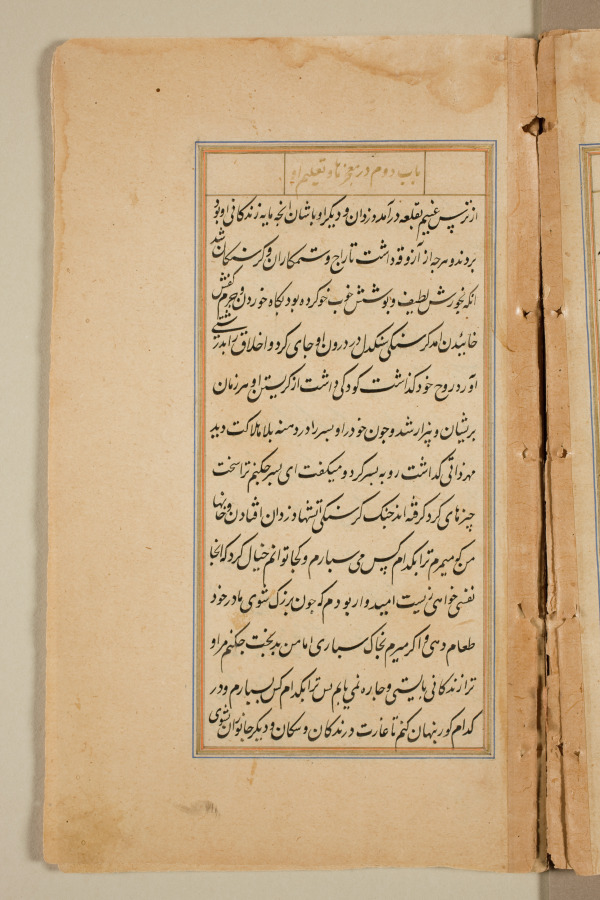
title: Text page from a Mirror of Holiness (Mir’at al-quds) of Father Jerome Xavier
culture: Mughal India, Allahabad, made for Prince Salim (1569–1627)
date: 1602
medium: Ink and gold on paper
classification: Manuscript